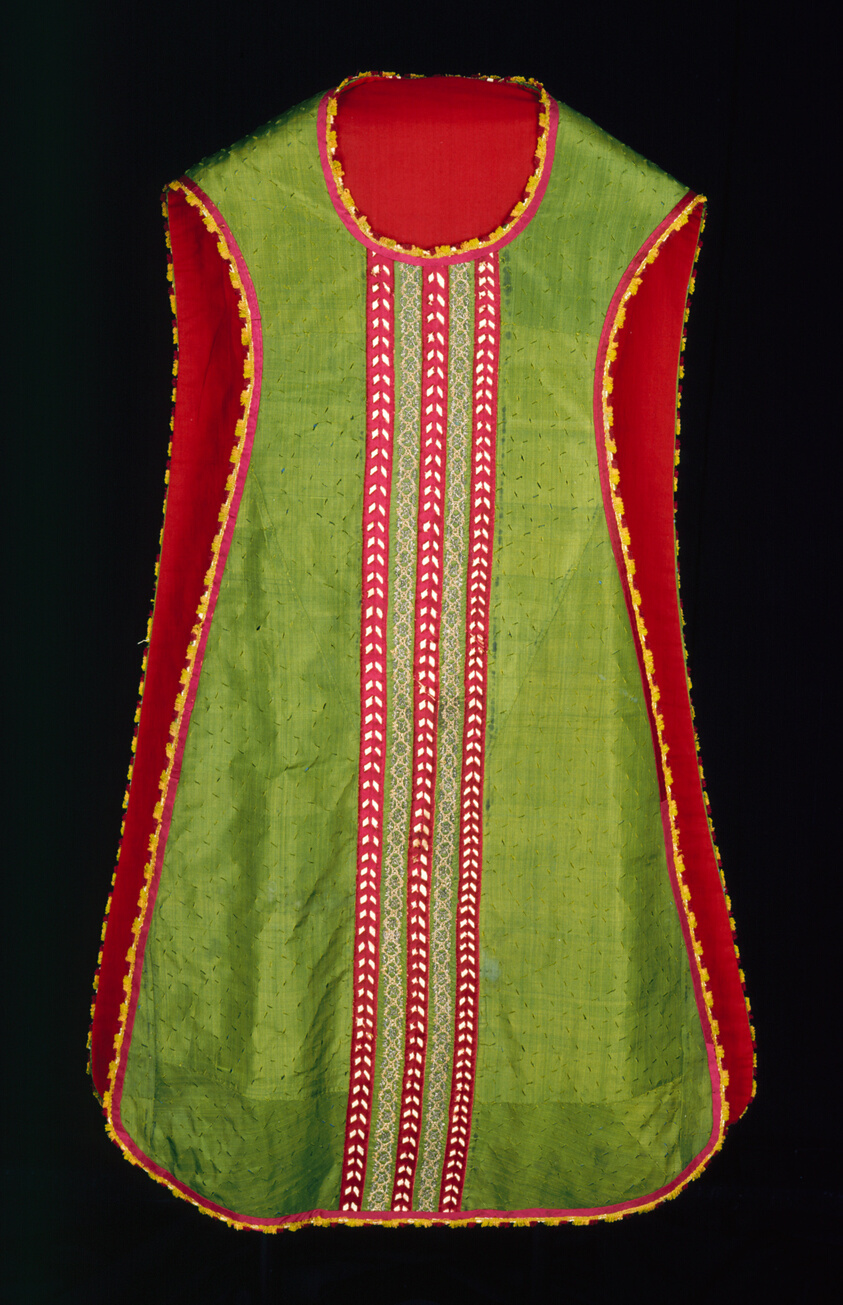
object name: Textile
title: Chasuble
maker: Spain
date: 1575/1625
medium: Silk, plain weave; slashed; appliquéd with silk, warp-float faced 7:1 satin weave, slashed and interlaced with a warp-float faced 7:1 satin weave strip, and gilt-metal-strip-wrapped silk, bobbin-made tapes; edged with silk, twined fringe; lined with cotton, plain weave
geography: Spain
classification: textile; needlework (visual works); liturgical